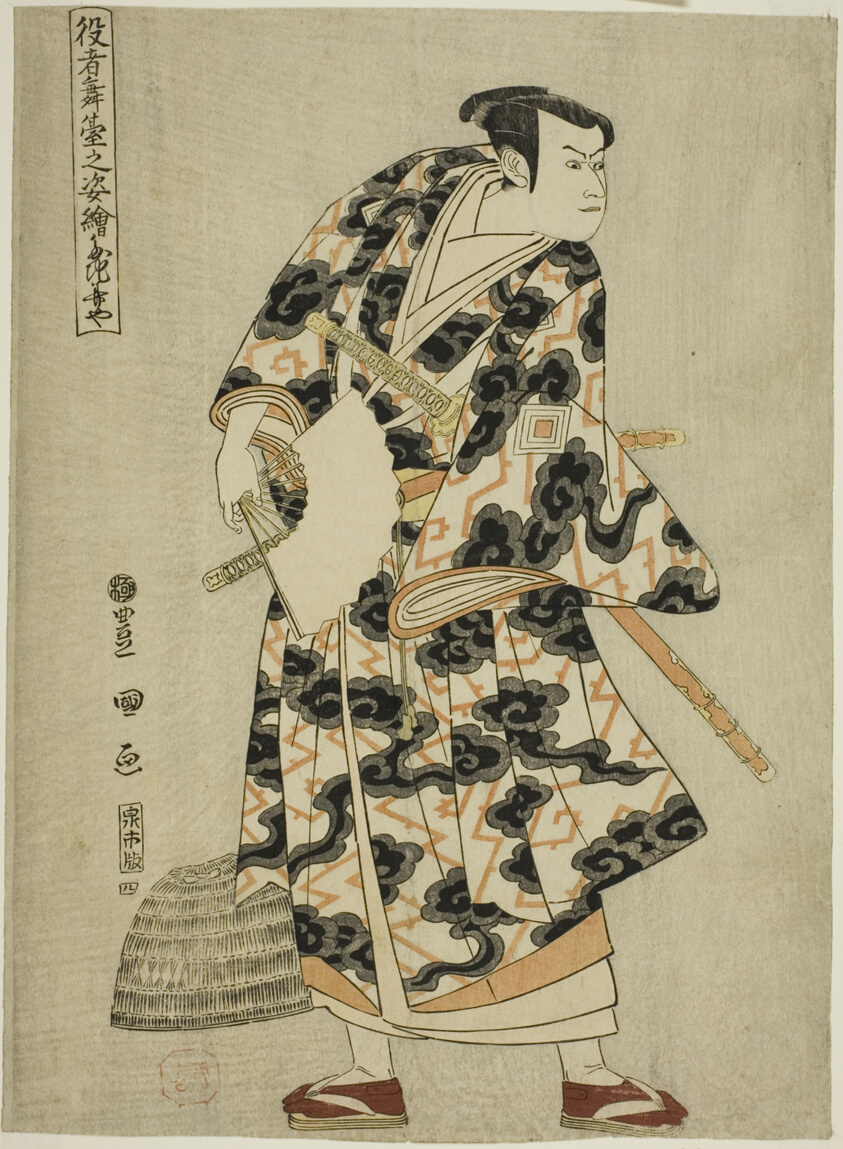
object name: Print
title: Tachibanaya: Ichikawa Yaozo III as Fuwa Banzaemon, from the series "Portraits of Actors on Stage (Yakusha butai no sugata-e)"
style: Japanese (culture or style)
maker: Utagawa Toyokuni I 初代 歌川 豊国; Japanese, 1769–1825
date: 1794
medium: Color woodblock print; oban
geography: Japan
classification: woodblock print; print; asian art